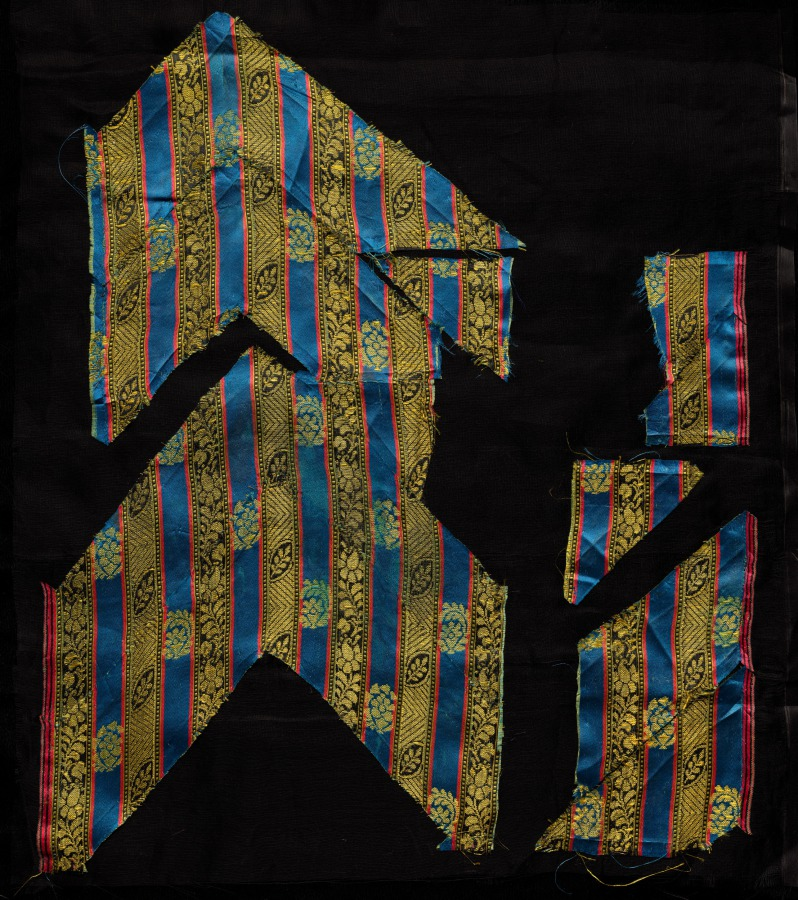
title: Fragments Pieced Together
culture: India, 18th-19th century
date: 1700s - 1800s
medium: lampas weave, brocaded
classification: Textile